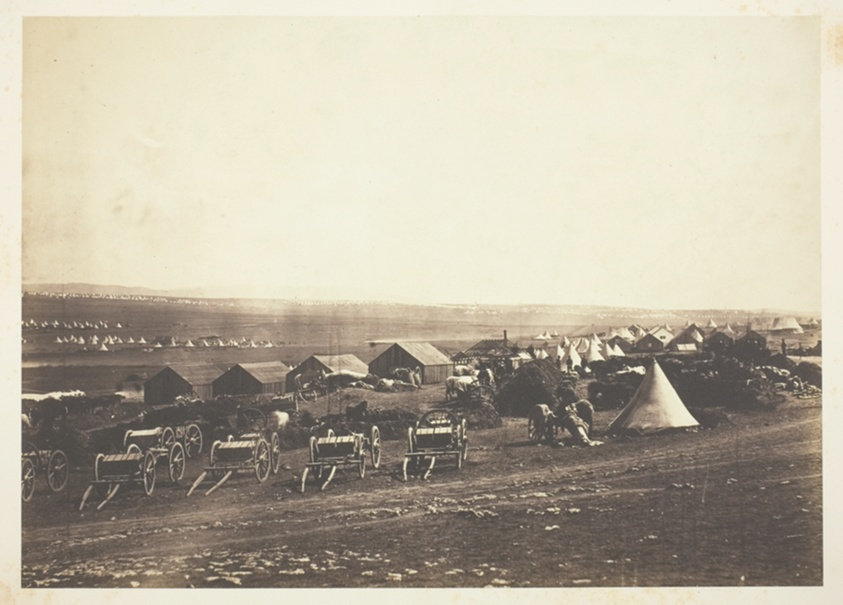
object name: Photograph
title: Artillery Waggons, Balaklava in the Distance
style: 19th century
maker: Roger Fenton (English, 1819–1869)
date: 1855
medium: Salted paper print, from the album "Photographic Pictures of the Seat of War in the Crimea" (1856)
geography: England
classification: salted paper print; photographic process; photography; photograph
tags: Collected by Hugh Edwards